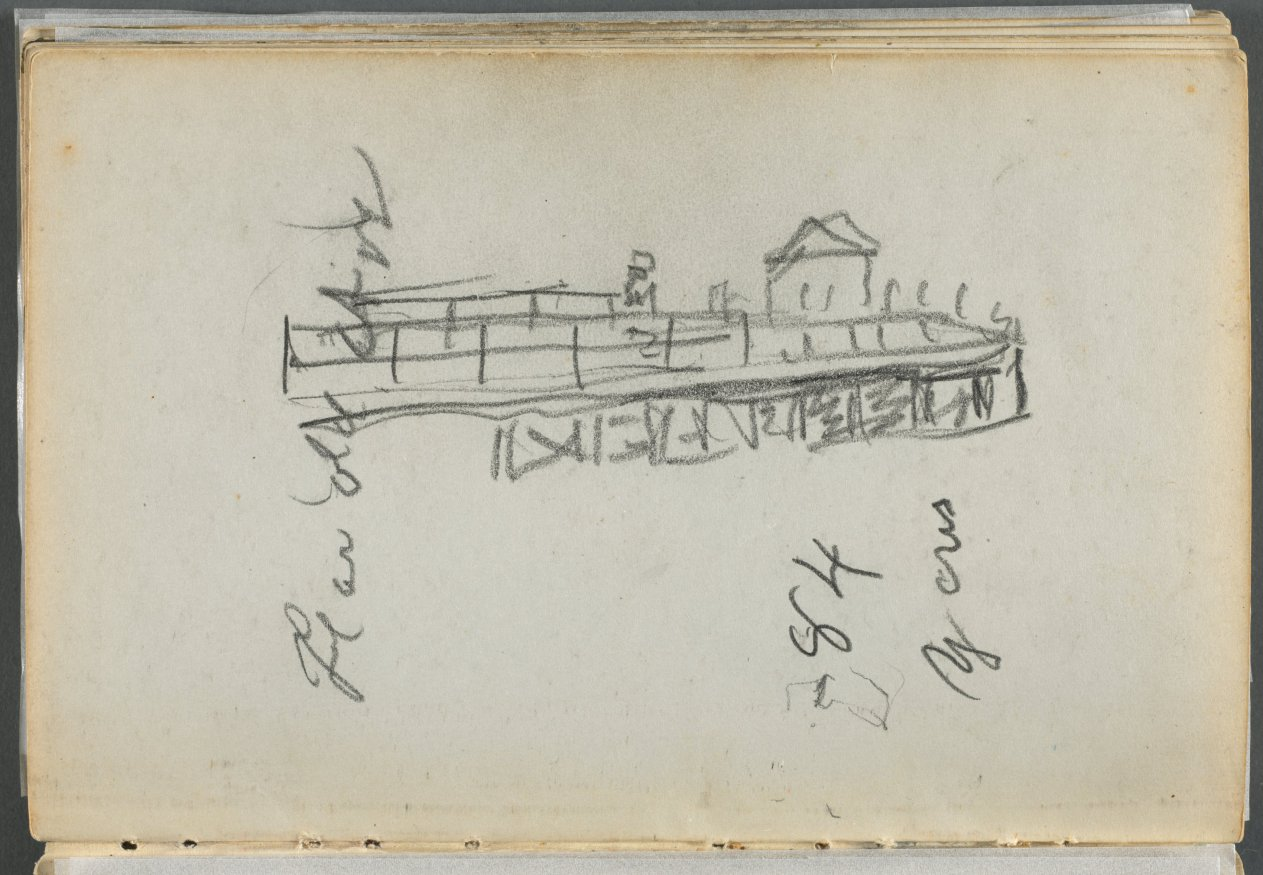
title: Sketchbook, The Dells, N° 127, page 186: Dock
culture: America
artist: Maurice Prendergast (American, born Newfoundland [now Canada], 1858–1924)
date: c. 1919–1921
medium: graphite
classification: Bound Volume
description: This sketchbook contains 59 pages of graphite drawings and 16 watercolors made at various locations on Cape Ann, Massachusetts.